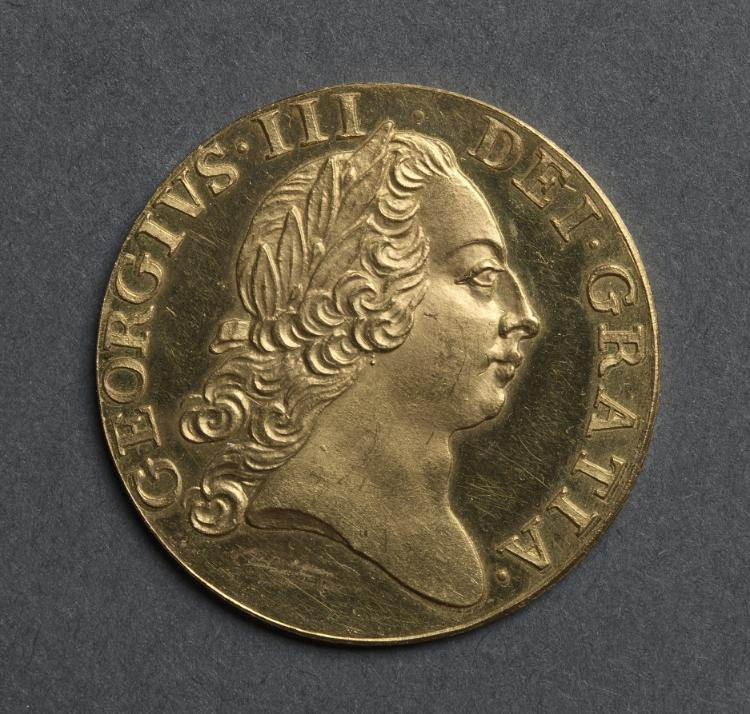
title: Guinea: George III (obverse)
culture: England, George III, 1760-1820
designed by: Richard Yeo (British, 1720–1779)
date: 1761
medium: gold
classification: Coins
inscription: DEI . GRATIA . GEORGIVS . III .